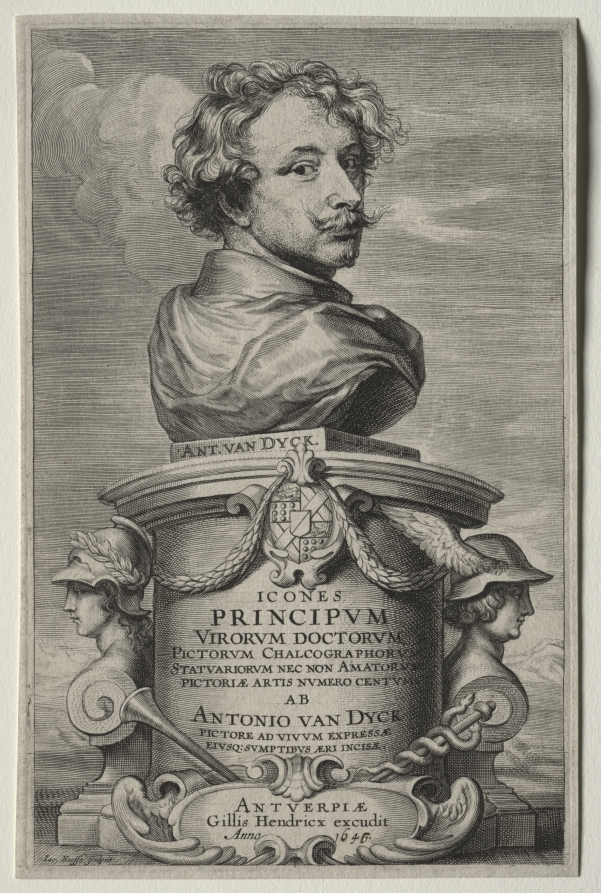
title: Self-Portrait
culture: Flanders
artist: Anthony van Dyck (Flemish, 1599–1641)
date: 1646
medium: etching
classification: Print